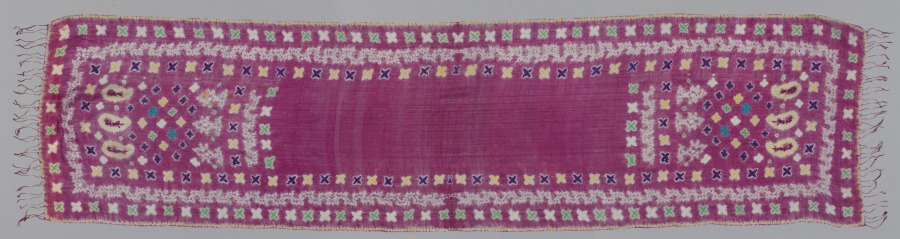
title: Silk Veil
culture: India, 19th - 20th century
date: 1800s - early 1900s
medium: tritik (stitch resist); silk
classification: Textile